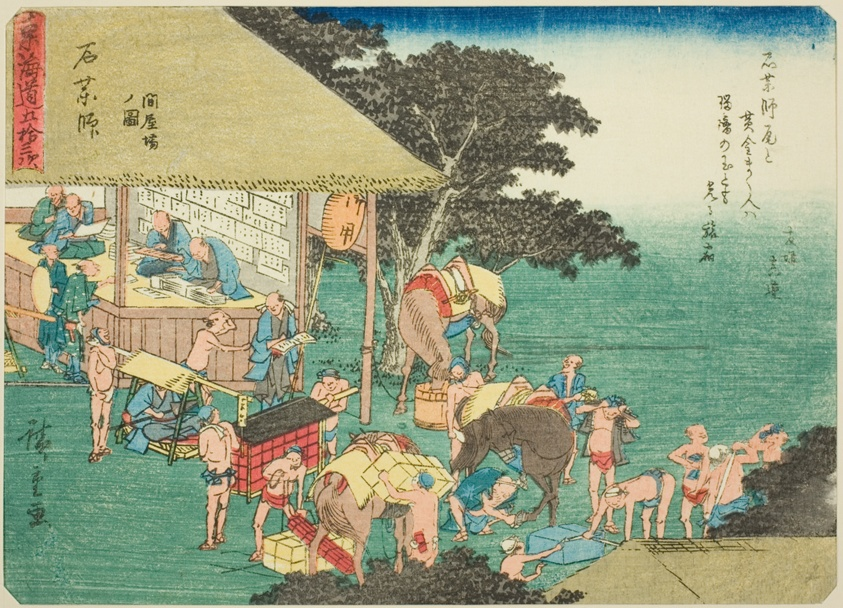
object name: Print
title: Ishiyakushi: The Post House (Ishiyakushi, toiyaba no zu), from the series "Fifty-three Stations of the Tokaido (Tokaido gojusan tsugi)," also known as the Tokaido with Poem (Kyoka iri Tokaido)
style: Japanese (culture or style)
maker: Utagawa Hiroshige 歌川 広重; Japanese, 1797-1858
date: c. 1837/42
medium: Color woodblock print; chuban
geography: Japan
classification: woodblock print; print; asian art